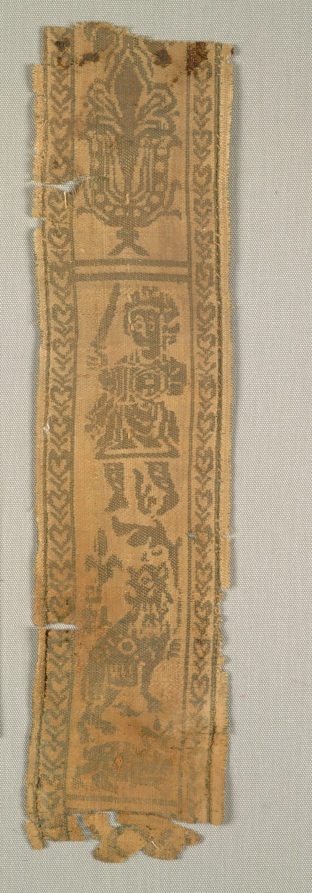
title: Silk Decorative Tunic Band with a Hunter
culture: Egypt or Syria, Umayyad period (661–750) or Abbasid period (750–1258)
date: 700s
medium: Silk: complementary weft-faced twill with inner warps (samit)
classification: Textile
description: This prestigious silk band displays a stylized palmette leaf above a hunter who holds a sword and a shield and pursues a lion and a rabbit. Another fragment with Arabic script indicates Islamic manufacture. Green and ivory silk wefts (horizontal threads) dominate, interlaced by warps (vertical threads) in a diagonal twill weave. A second inner warp does not come to the surface. Such compound structures were woven on large looms with automatic pattern repetition, called drawlooms.